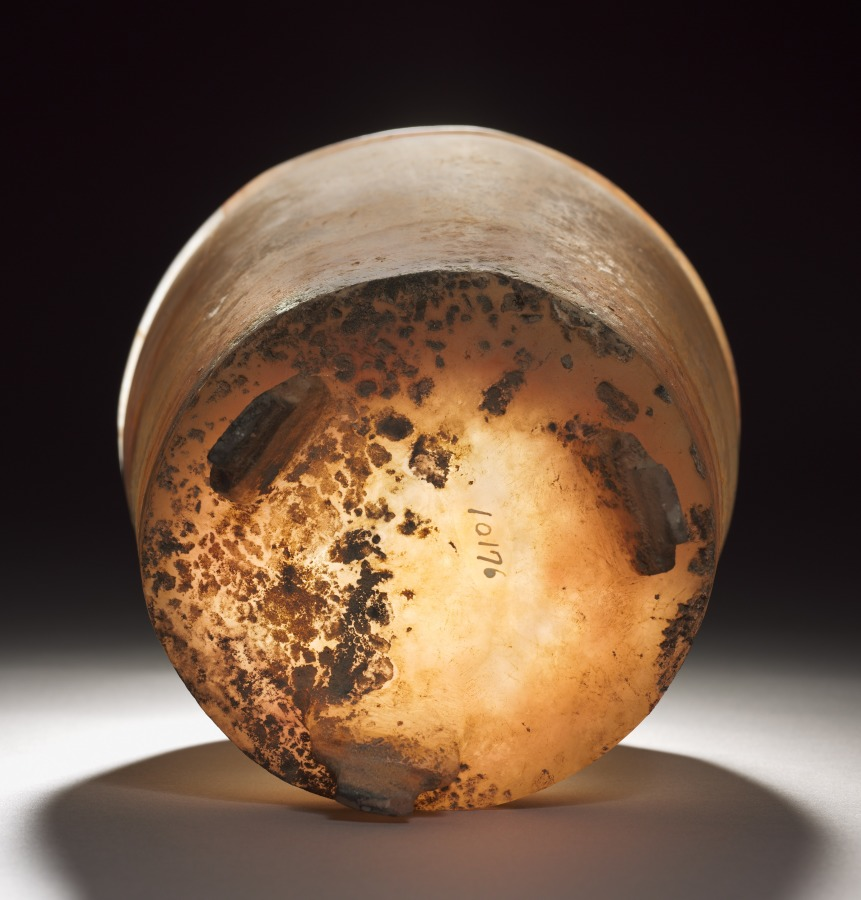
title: Offering Group: Vessel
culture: Mexico, Guerrero(?), San Jerónimo de Juárez, Xochicalco style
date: c. 800–1200(?)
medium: travertine or tecali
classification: Sculpture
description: The objects in this group, all with traces of red pigment, are said to have been found together, the shells and greenstone plaque inside the translucent stone vessel. A similar offering was found in a pyramid ornamented with feathered serpents at Xochicalco, a site south of the Valley of Mexico.